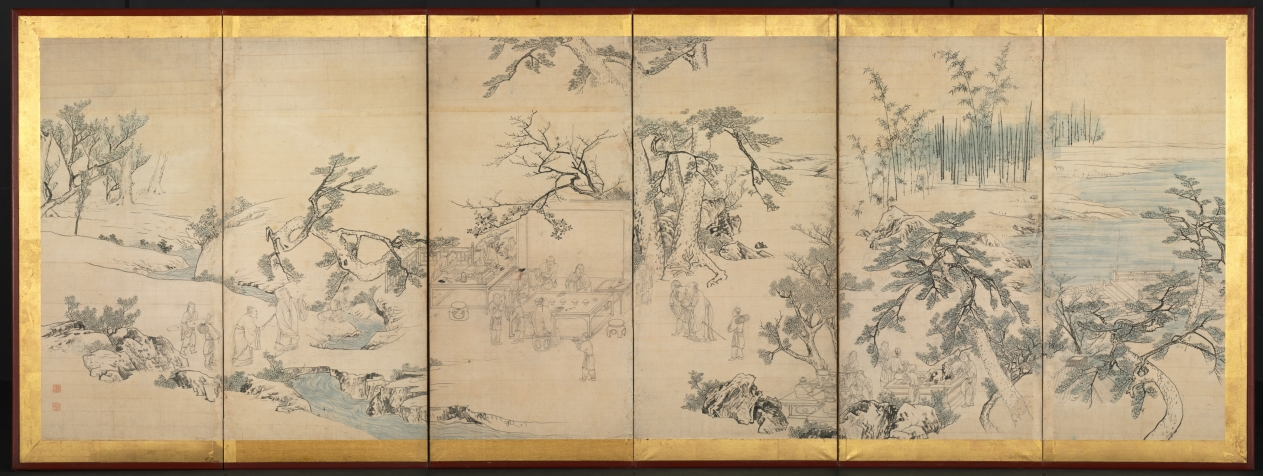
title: Literary Gathering in the Orchid Pavilion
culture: Japan, Edo period (1615–1868)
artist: Maruyama Ōkyo (Japanese, 1733–1795)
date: late 1700s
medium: Six-panel folding screen; ink and slight color on paper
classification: Painting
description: A cheerful gathering of poets was one the most popular themes of East Asian literati paintings. Literary Gathering in the Orchid Pavilion depicts a poets’ party hosted in AD 353 by the famous Chinese calligrapher Wang Xizhi to celebrate the Spring Purification Festival, observed annually on the third day of the third month. Wang invited 41 scholar-poets to compose poetry and drink while seated along the bank of a winding rivulet. This screen would have appeared on the left and shows preparations for the gathering. The lost right screen is assumed to have depicted the poets sitting along the stream.